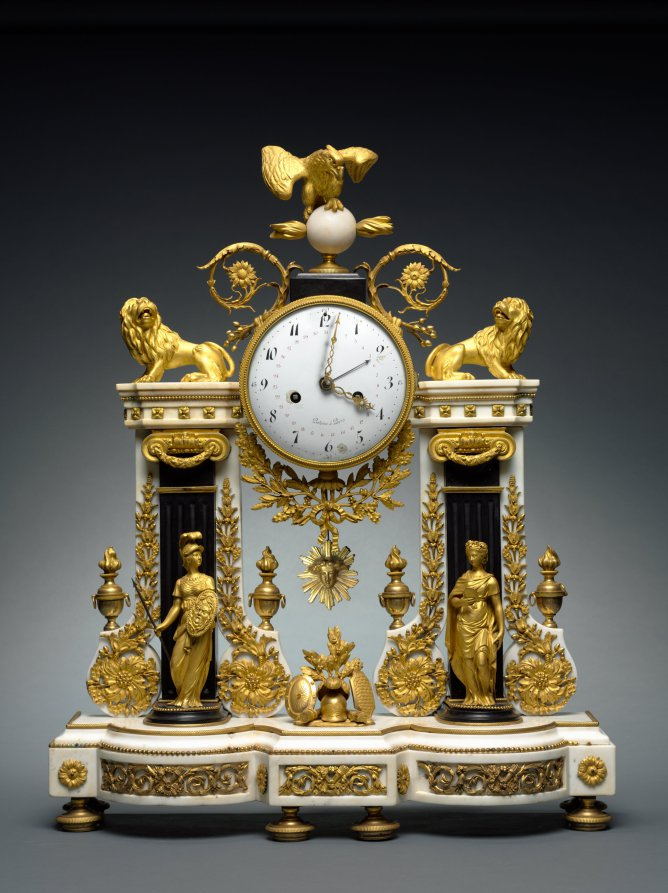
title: Mantel Clock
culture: France, Paris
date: c. 1780–90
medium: marble, gilt-bronze, glass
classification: Stone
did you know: This clock echoes elements of Greek mythology. At left, Athena stands with her helmet on and shield ready. Screen reader support enabled.